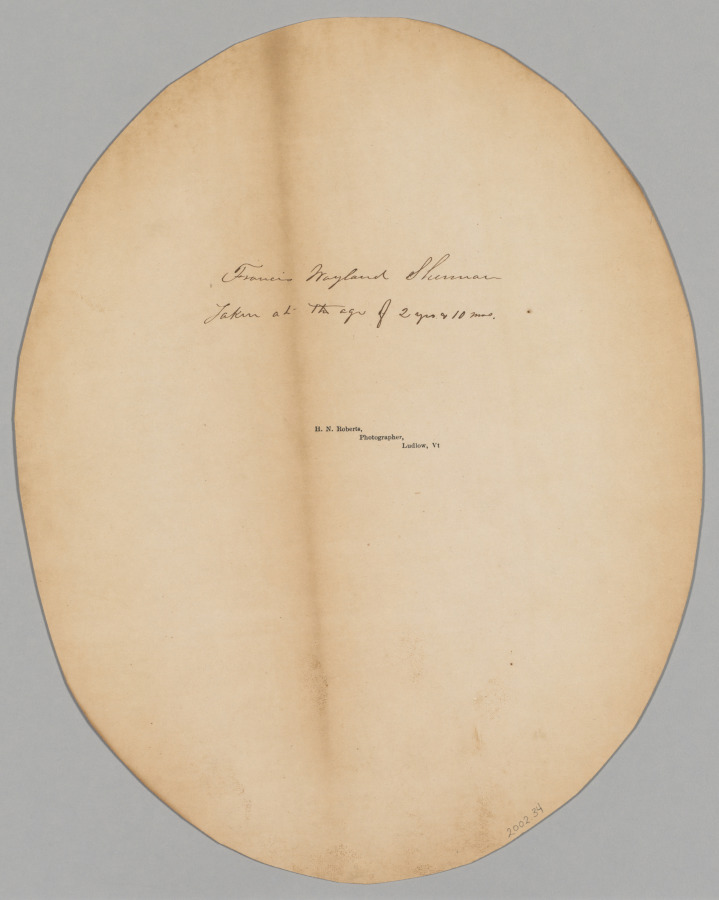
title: Francis Wayland Sherman at the Age of 2 Years 10 Months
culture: America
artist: H.N. Roberts (American, active 1860s)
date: 1862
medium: albumen print from wet collodion negative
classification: Photograph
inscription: written in brown ink on verso: "Francis Wayland Sherman/ Taken at the age of 2 yrs + 10 mos."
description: An inscription on the back of this photograph records the sitter’s identity and age. Because he belonged to a prominent family, it was possible to learn through research that he grew up in Ludlow, Vermont, the son of a successful businessman with pharmaceutical and music enterprises that he later managed. The rocking horse, a favorite toy of Victorian nurseries, may have belonged to the wealthy child or have been a prop in the photographer’s studio. This is an especially luxurious example. Dappled gray rocking horses were the most popular in that era, having been favored by Queen Victoria for her children’s nursery.